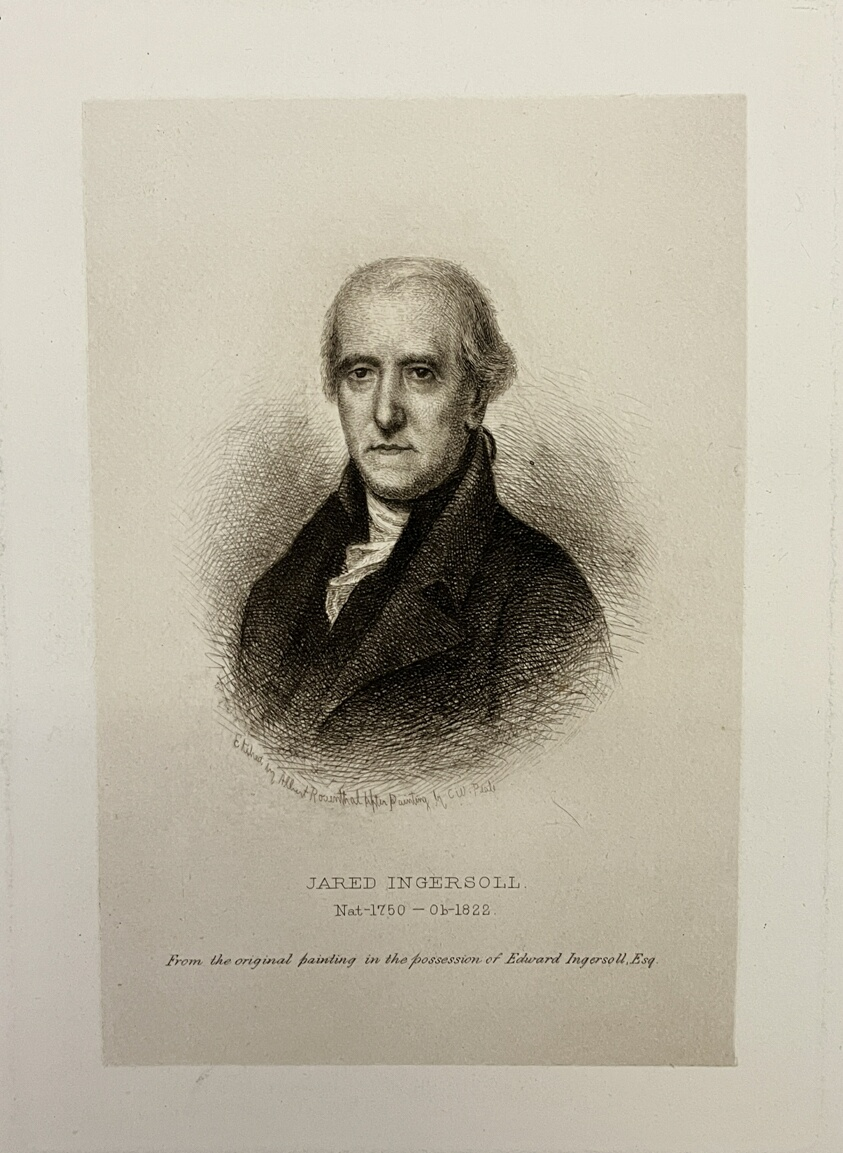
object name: Print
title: Jared Ingersoll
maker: Albert Rosenthal (American, 1863-1939); after Charles Wilson Peale (American, 1741-1827)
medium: Etching on paper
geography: United States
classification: reproduction; print; prints and drawing